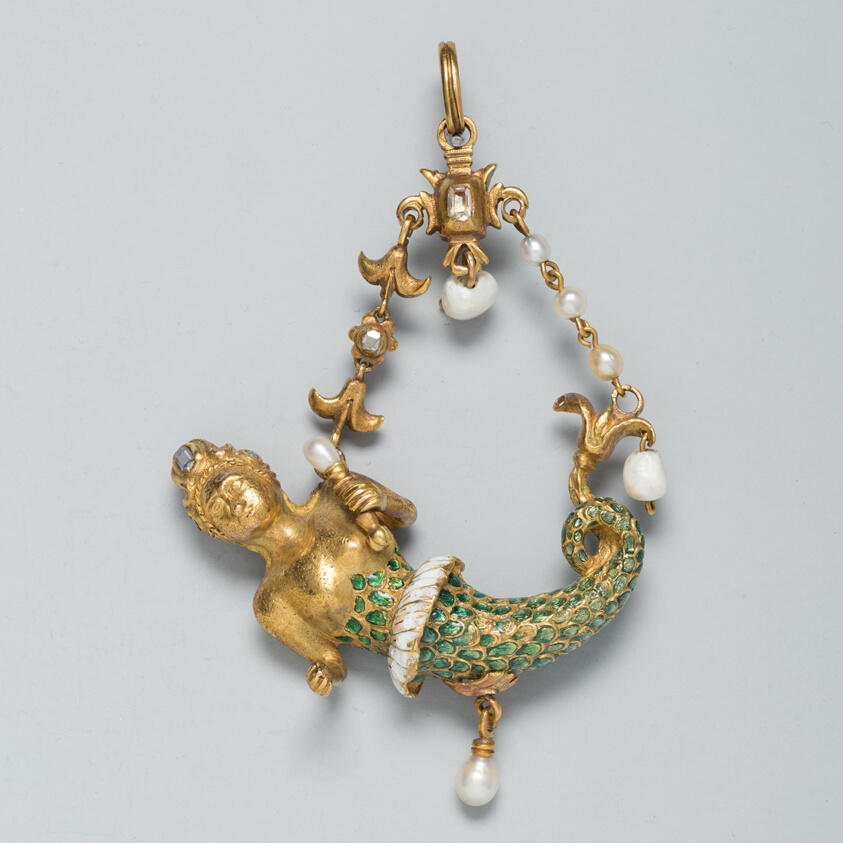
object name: Costume and Accessories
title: Pendant Shaped as a Mermaid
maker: Spanish or Spanish Colonial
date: c. 1575-c. 1600, with later modifications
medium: Gold, enamel, diamonds, and pearls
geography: Spain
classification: pendant (jewelry); jewelry; european decorative arts; costume